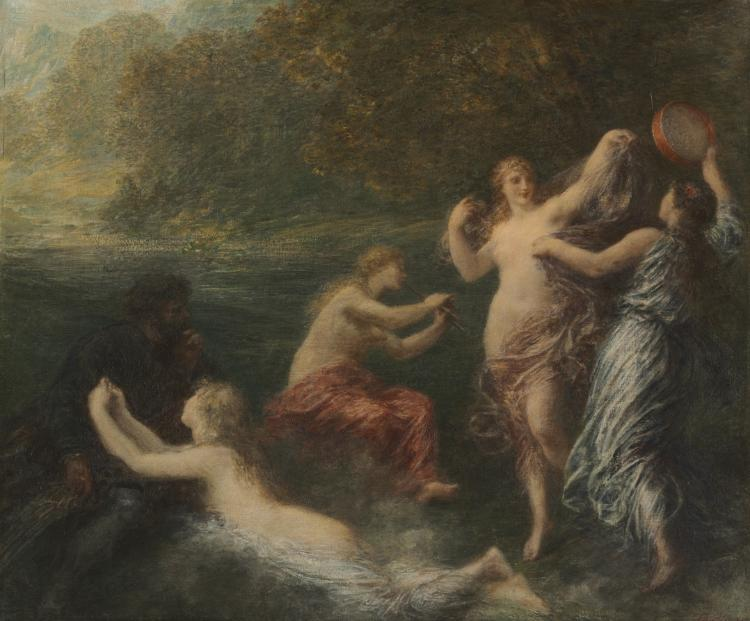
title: Tannhäuser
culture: France, 19th century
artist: Henri Fantin-Latour (French, 1836–1904)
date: 1886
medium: oil on canvas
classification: Painting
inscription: Signed lower right: Fantin 86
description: Tannhäuser, the male figure seated on the left, does not seem fully engaged in this merry scene. Among pale bodies and pastel hues, he alone is cast in shadow. The Wagner opera that inspired the painting centers on a struggle between profane and sacred love, and the tension between them appears embodied in the brooding Tannhäuser.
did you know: As he will eventually return to reality, Tannhäuser, the singer in the lower left, is painted in dark tones. In contrast, his vision into another realm is evoked by the soft muted hues of Venus and her court.